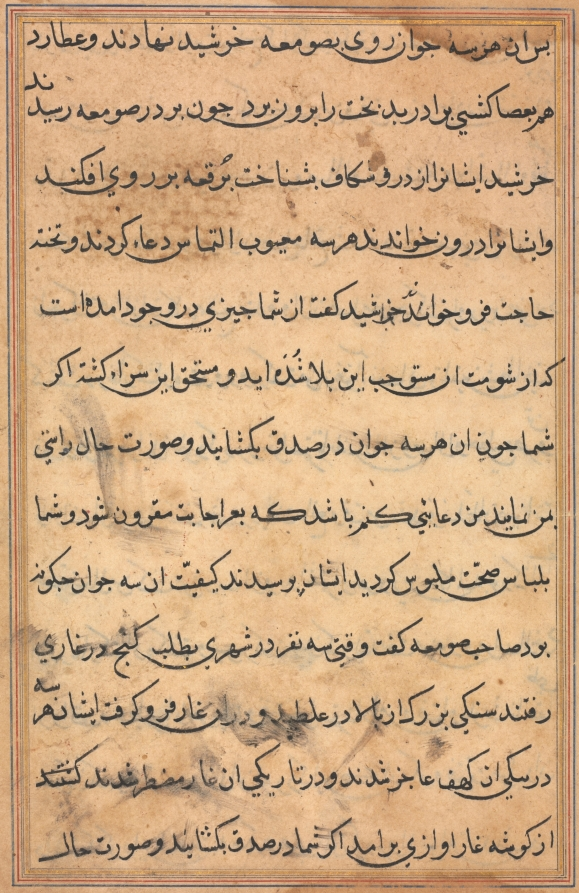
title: Page from Tales of a Parrot (Tuti-nama): text page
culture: Mughal India, court of Akbar (reigned 1556–1605)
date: c. 1560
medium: gum tempera, ink, and gold on paper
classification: Painting